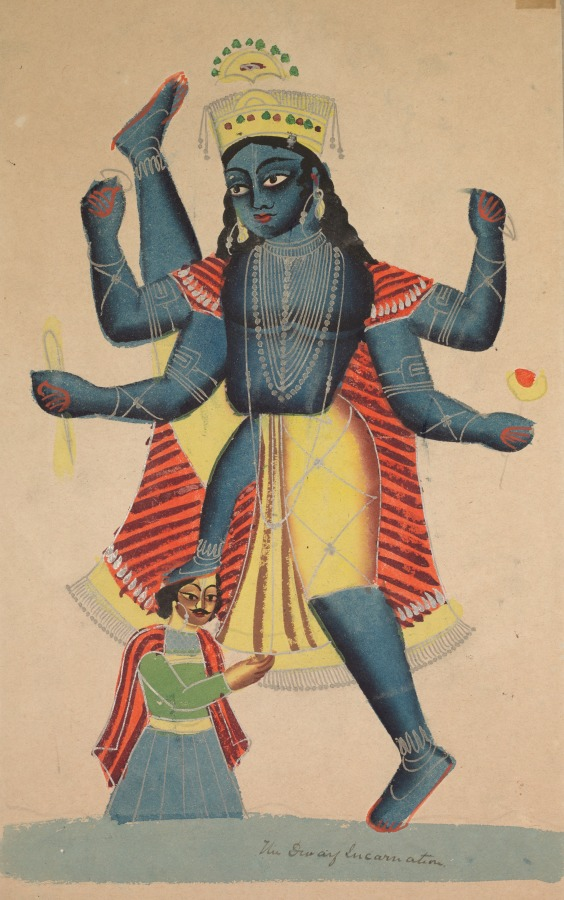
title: Trivikramapada (Three Steps of Vishnu)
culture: Eastern India, Bengal, Kolkata, Kalighat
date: c. 1890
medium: Gum tempera, graphite, ink, and tin on paper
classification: Painting